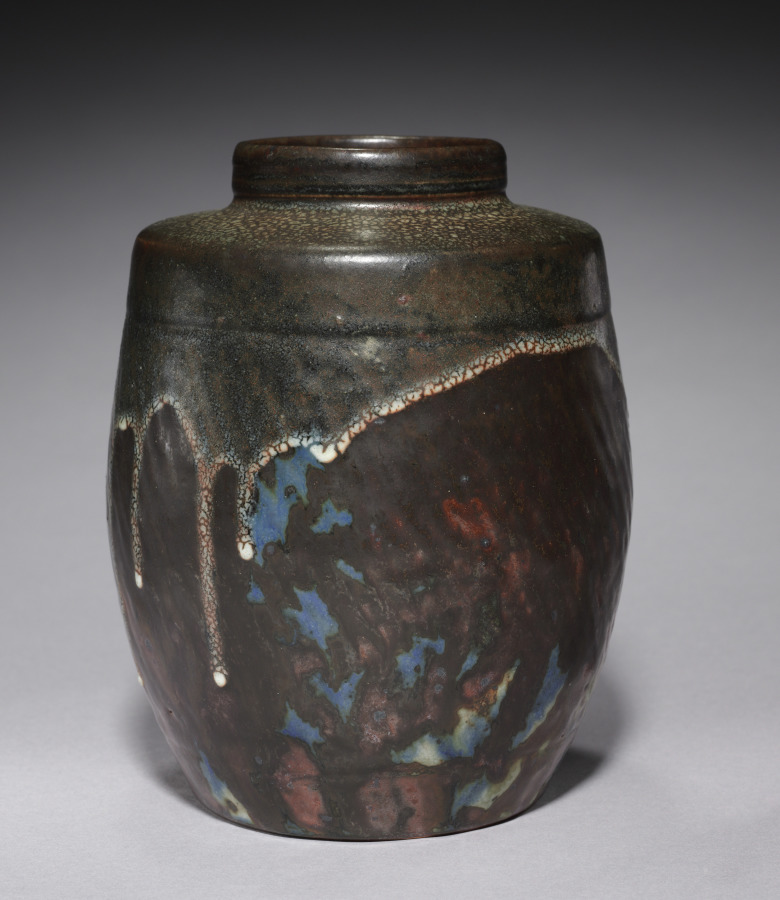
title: Vase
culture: France, early 20th Century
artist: Paul Jeanneney (French, 1861–1920)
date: c. 1900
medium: stoneware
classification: Ceramic